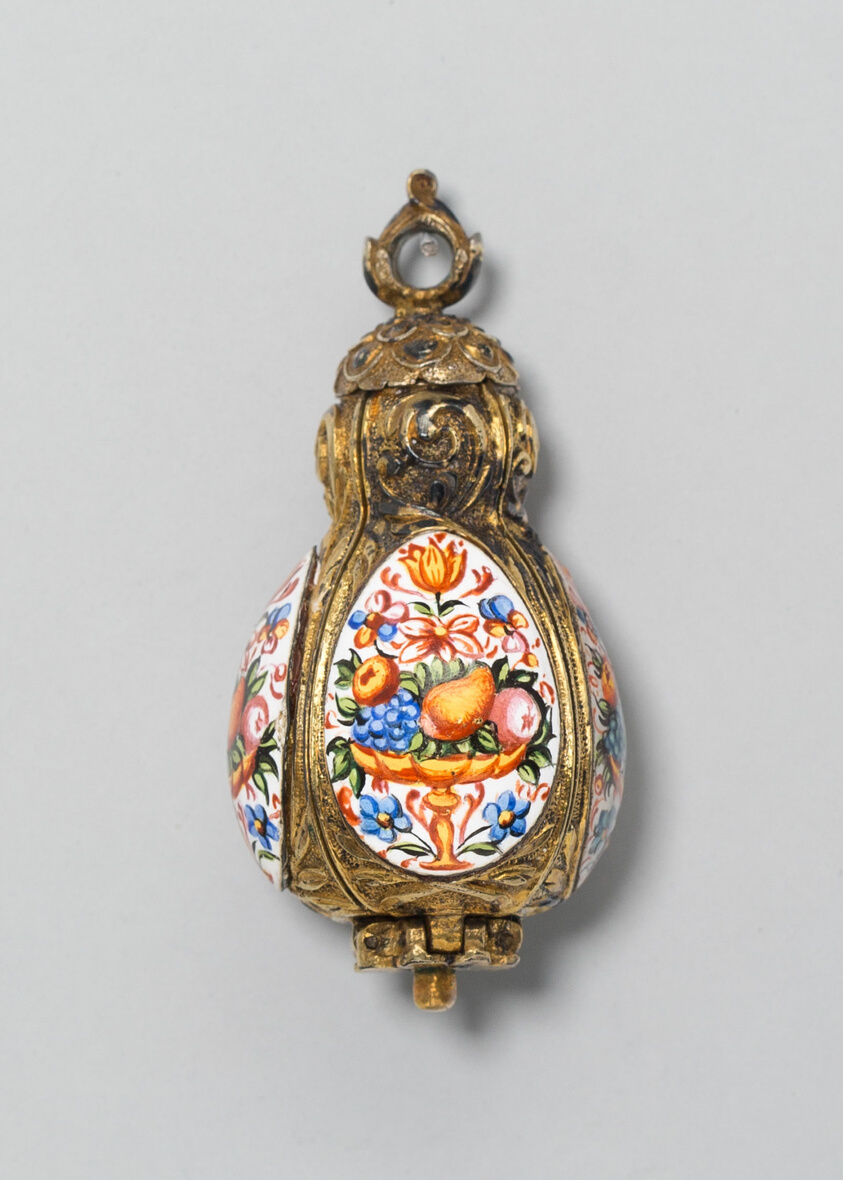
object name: Costume and Accessories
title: Pomander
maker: German or Dutch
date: c. 1625-c. 1675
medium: Silver gilt and enamel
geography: Netherlands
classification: jewelry; european decorative arts; costume